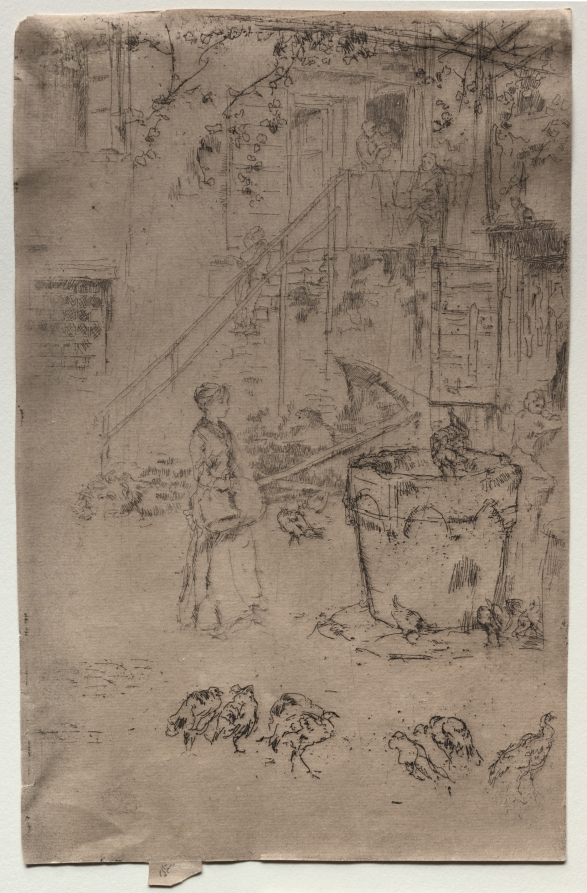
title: Turkeys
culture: America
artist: James McNeill Whistler (American, 1834–1903)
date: 1886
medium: etching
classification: Print